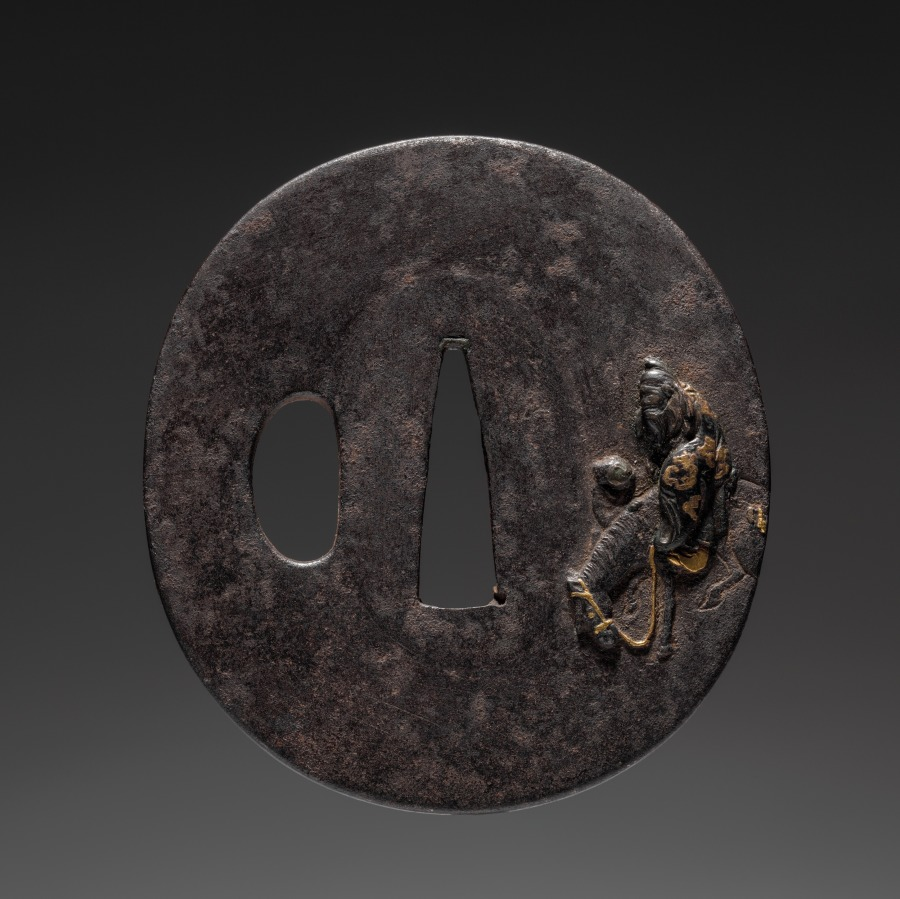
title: Sword Guard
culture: Japan, Edo period (1615–1868)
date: 1766–1834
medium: metal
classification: Arms and Armor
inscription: Signature: Mitsuoki